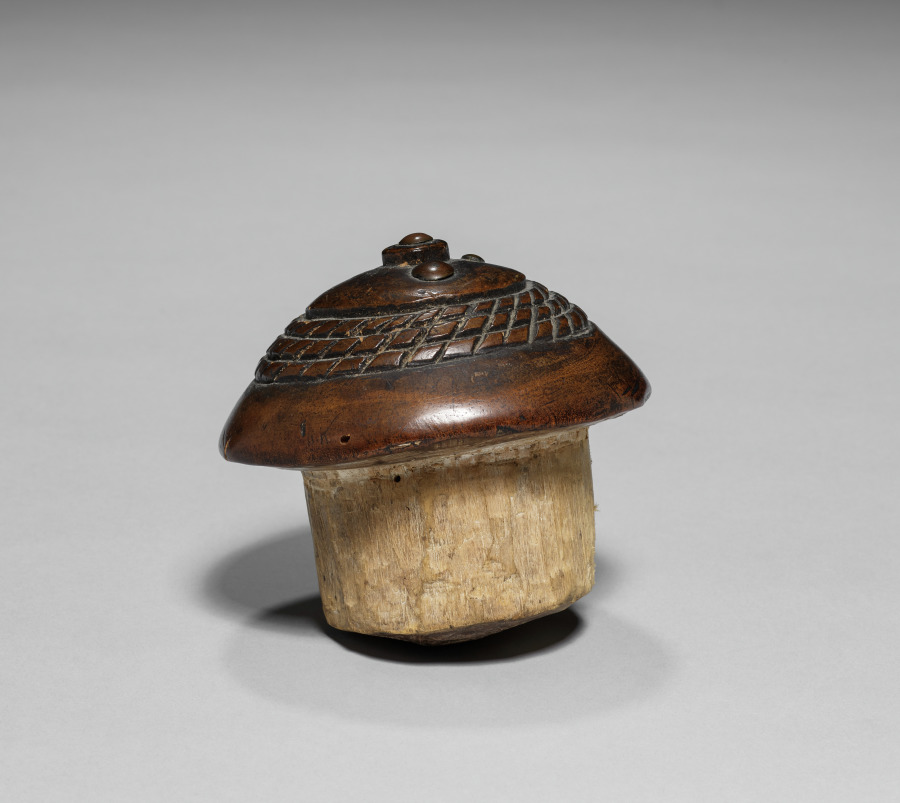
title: Female Bowl-Bearing Figure (lid)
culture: Africa, Central Africa, Democratic Republic of Congo, Luba-style carver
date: late 1800s-early 1900s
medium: Wood and upholstery studs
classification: Sculpture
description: This lid is part of a bowl-bearing figure. In Luba-style art, an object's beauty affects how well it works. While bowl-bearing figures had many possible uses, a royal diviner likely used this well-carved image of a woman carrying a bowl in rituals. Dusty traces of mpemba (white chalk) fleck the shining exterior and the bowl's interior, showing it once held this sacred powder. Diamond-shaped scarification marks at her waist, chest, and back add to her beauty. Her hair is carved into the cascading layered hairstyle worn in the Luba region at the turn of the twentieth century. Strands of imported glass beads encircle her waist and neck, and dangle from her hair. The alternating white and blue beads may symbolize the moon and Mbidi Kiluwe, a culture hero linked to royal practice and smithing. While much Luba-style art depicts women—who are societally important—men created and owned the majority of such works.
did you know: It is rare for a Luba-style bowl bearer figure to still have its lid.